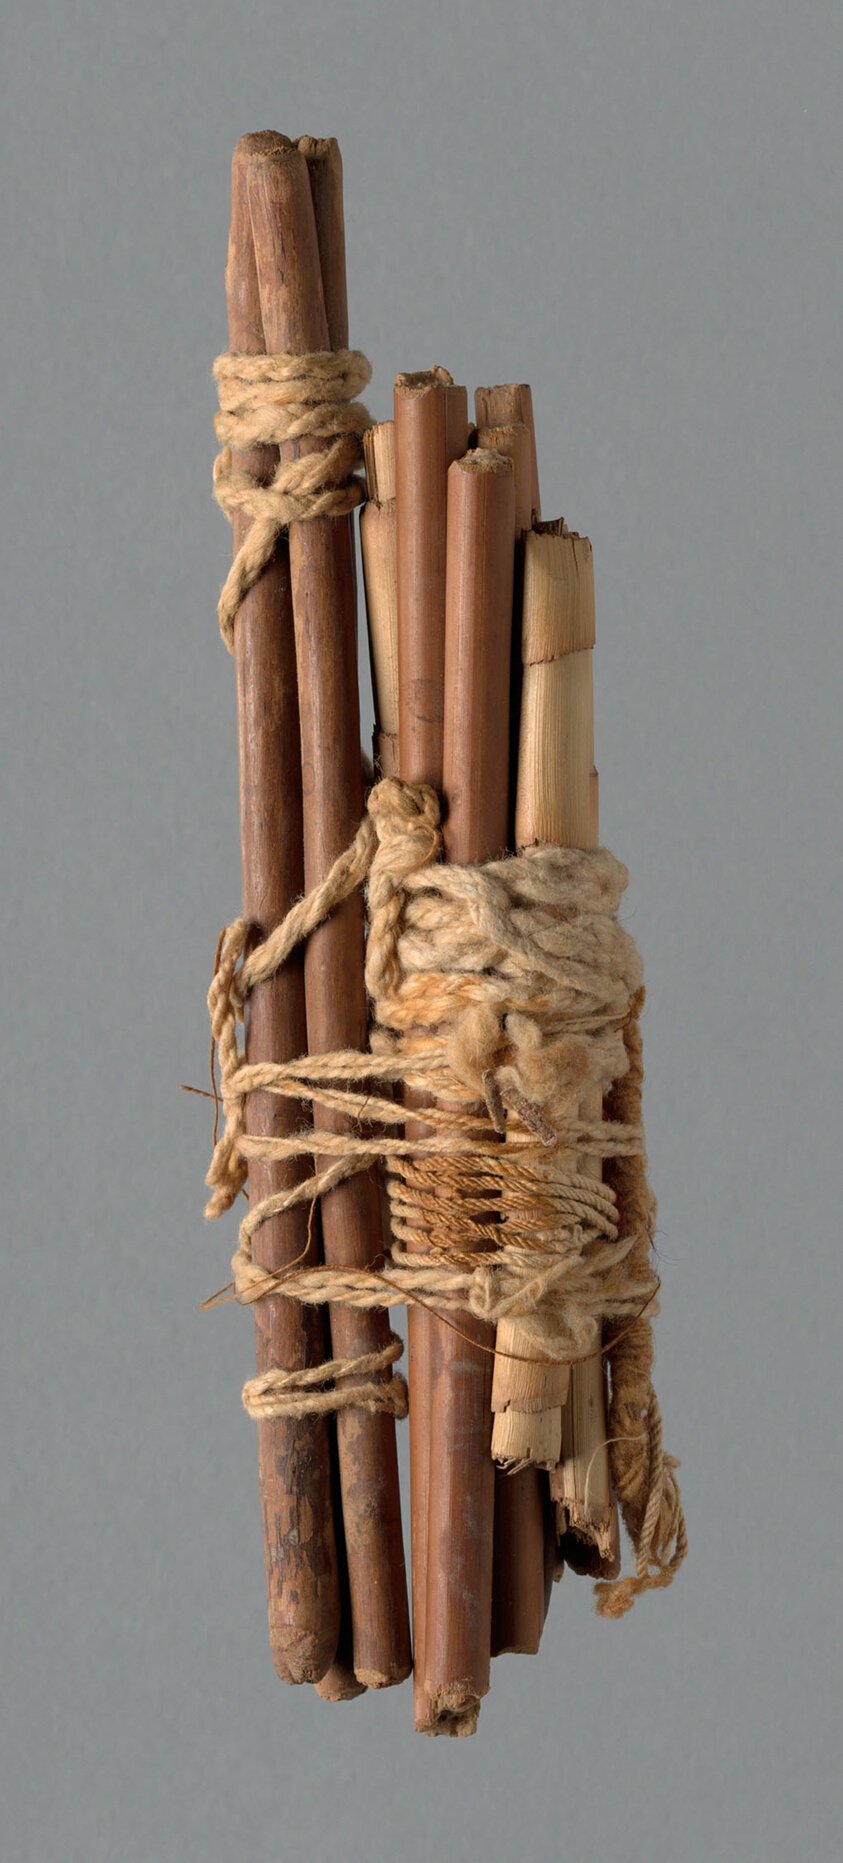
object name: non-art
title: Shed Sticks (?)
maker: Peru, Possibly central coast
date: 1000/1476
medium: Wood and fiber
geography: Peru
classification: textile; textile working equipment; weaving; accessories (object genre)